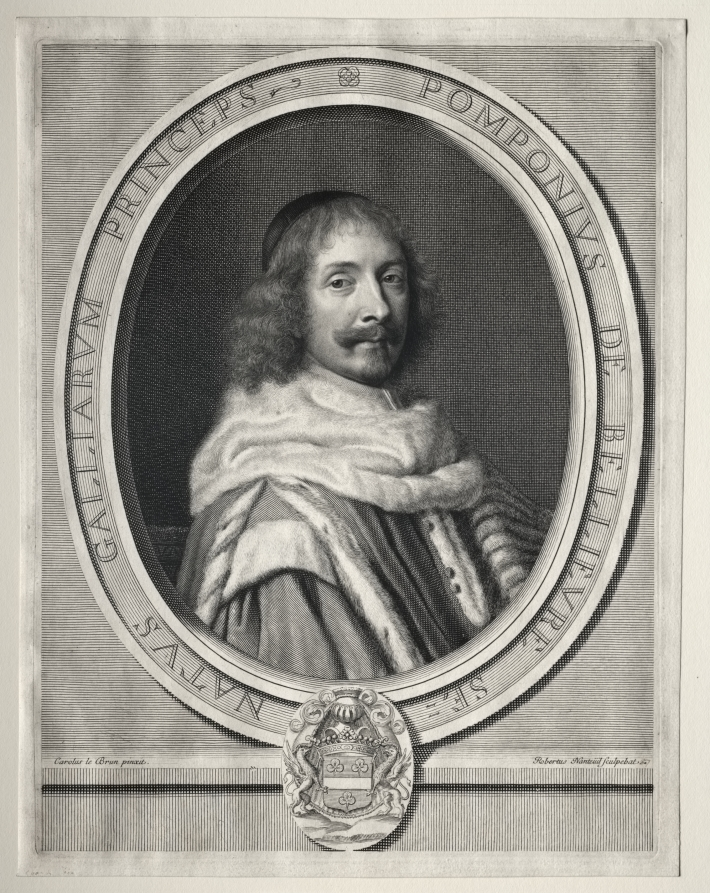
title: Pompone II de Bellière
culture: France, 17th century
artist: Robert Nanteuil (French, 1623–1678)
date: c. 1657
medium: engraving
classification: Print